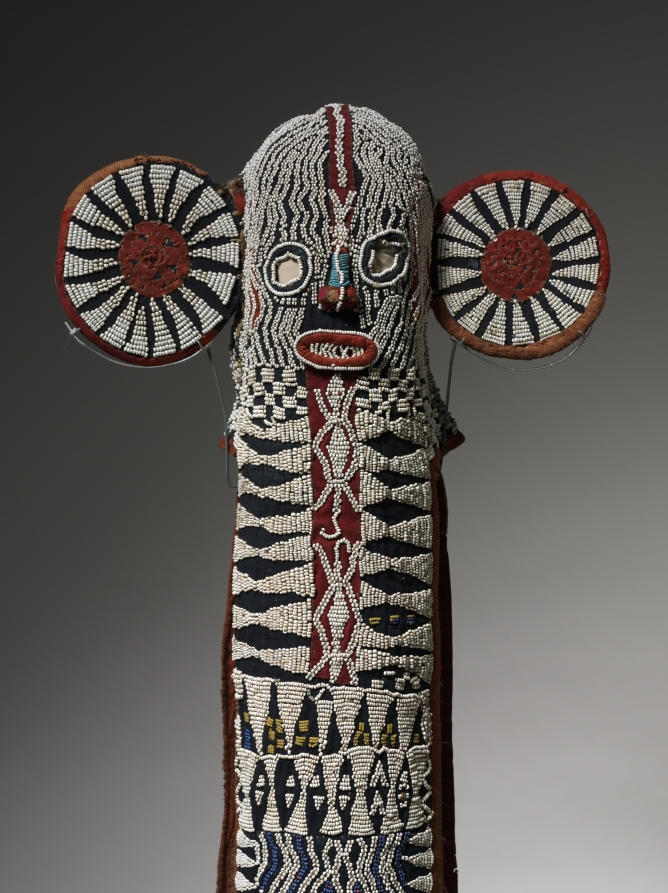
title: Mask (mbap mteng): Elephant (aka)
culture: Africa, Central Africa, Cameroon, Grassfields region, Bamileke-style maker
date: early 1900s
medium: Cotton, burlap, glass beads, twine, leather, and wood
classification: Mask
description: The name given to masks like this, mbap mteng, means "animal with huge ears." In the Cameroon Grassfields kingdoms, the elephant signifies power, authority, prestige, and leadership. The colorful glass beads that decorate the mask’s surface were imported from Venice and Bohemia (in Europe) and signal wealth and prosperity. Its geometric patterns include triangles that evoke the leopard, another animal linked with royal power. Members of Kuosi, an elite male society, wore such elephant masks for ritual dances and funerary ceremonies. This mask would have been worn with a costume that included a feather headdress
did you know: Performers wore elephant masks with indigo-dyed robes, red feather headdresses, and leopard pelts. Leopards and elephants symbolized royal power.